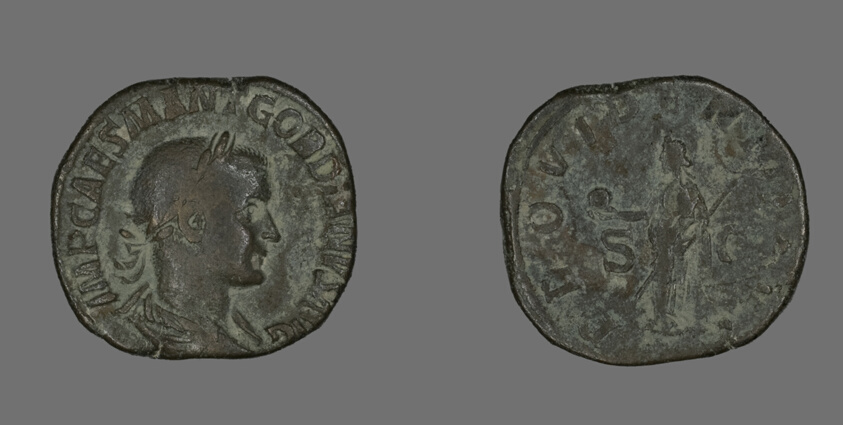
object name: Coin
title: Sestertius (Coin) Portraying Emperor Gordianus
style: roman (ancient, style or period), ancient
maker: Roman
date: 238-244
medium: Bronze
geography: Roman Empire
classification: coin; ancient art